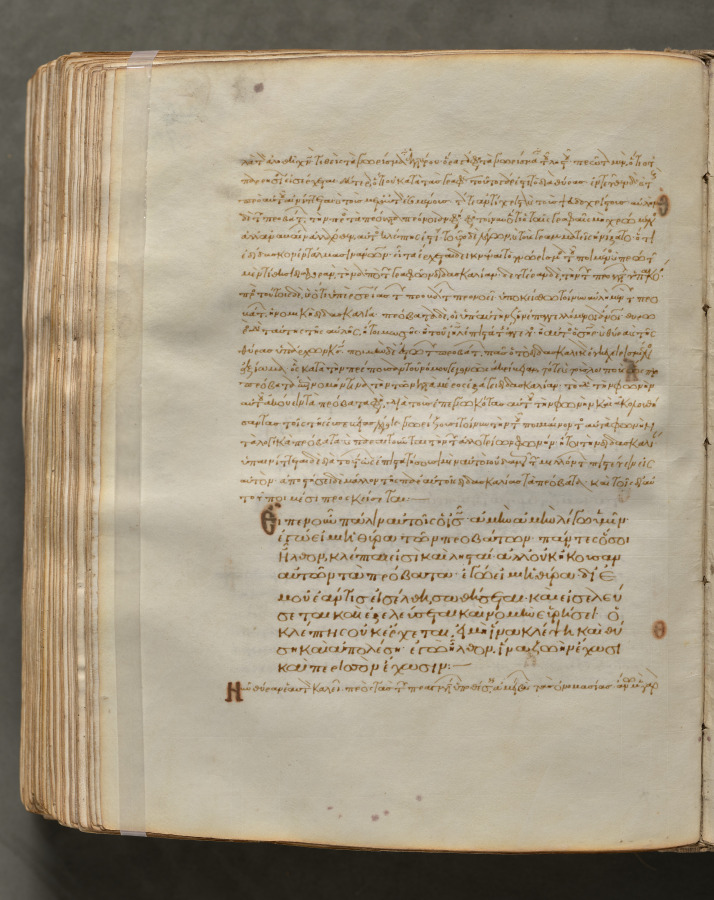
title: Text, folio 372 (verso), from a Gospel Book with Commentaries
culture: Byzantium, Constantinople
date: c. 1000–1100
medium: ink, tempera, and gold on vellum; leather binding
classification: Bound Volume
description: Each of the four gospels in this book opens on a page with brilliantly illuminated borders depicting the author of the text as well as birds—principally peacocks, symbols of the immortality of the soul—and fountains, representing the fountain of life and the salvation of the soul. This volume consists of 428 leaves with texts in Greek. Its level of sophistication suggests that it was probably written and decorated in a monastery in Constantinople.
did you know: Gospel books were carried in procession through Byzantine churches.